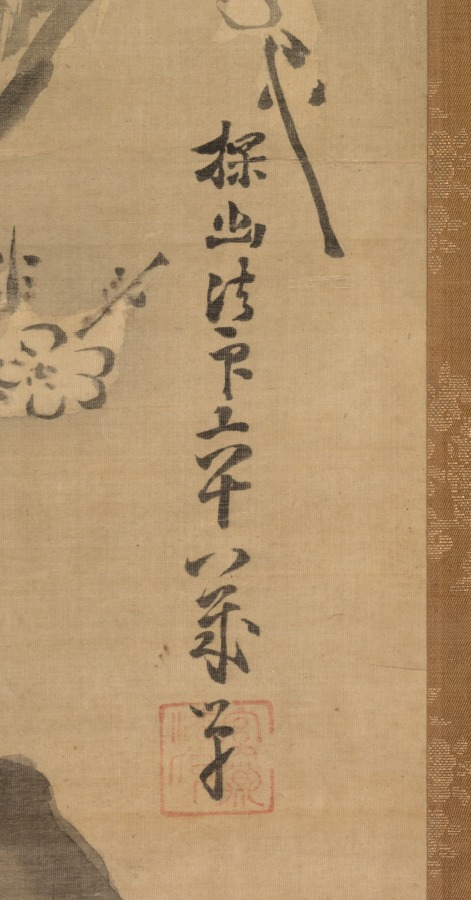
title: Sparrows on Blossoming Plum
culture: Japan, Edo period (1615–1868)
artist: attributed to Kano Tan’yū (Japanese, 1602–1674)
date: 1661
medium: One of a triptych of hanging scrolls; ink and slight color on silk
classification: Painting